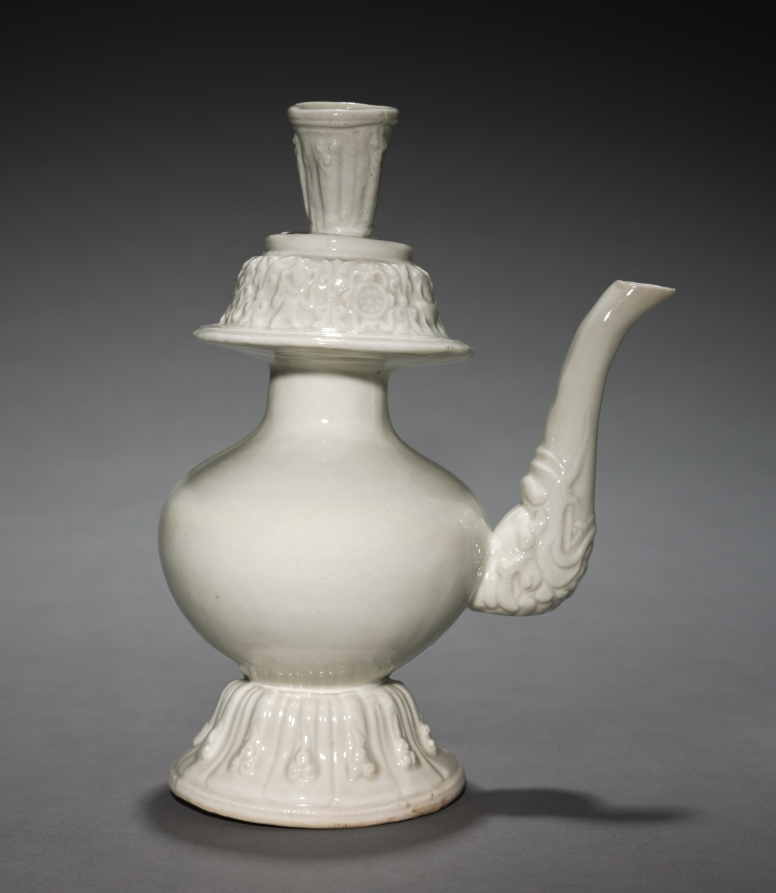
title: Ewer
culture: China, Yuan dynasty (1271-1368) - Ming dynasty (1368-1644)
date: 1300s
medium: porcelain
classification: Ceramic